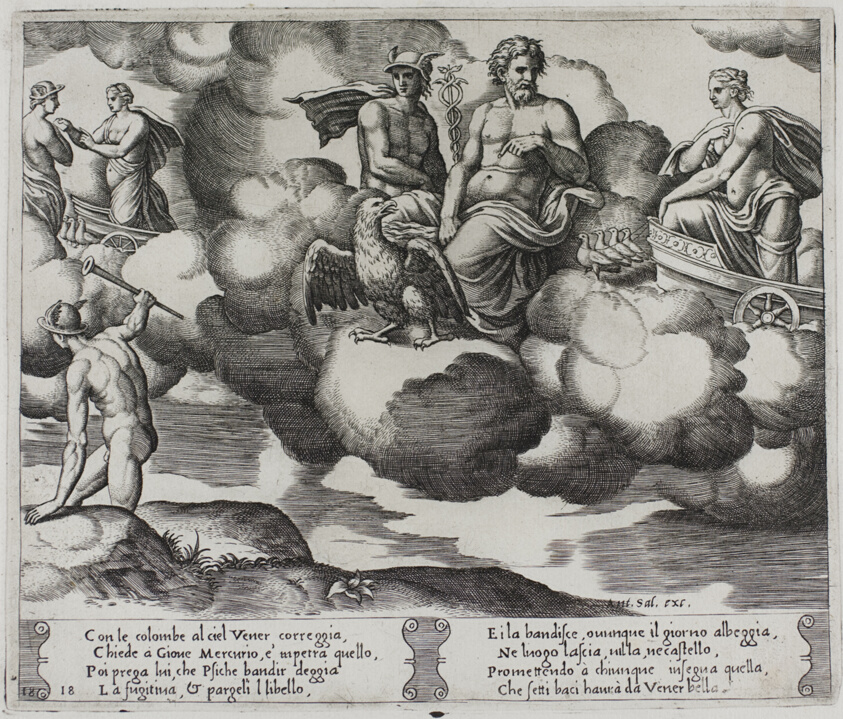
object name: Print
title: Venus Complains to Jupiter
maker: Master of the Die (Italian, active c. 1530-1560); after Michiel Coxcie I (Flemish, 1499-1592); in turn, inspired by Raffaello Sanzio, called Raphael (Italian, 1483-1520)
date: 1530/40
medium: Engraving in warm brown ink on cream laid paper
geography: Italy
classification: engraving; print; prints and drawing